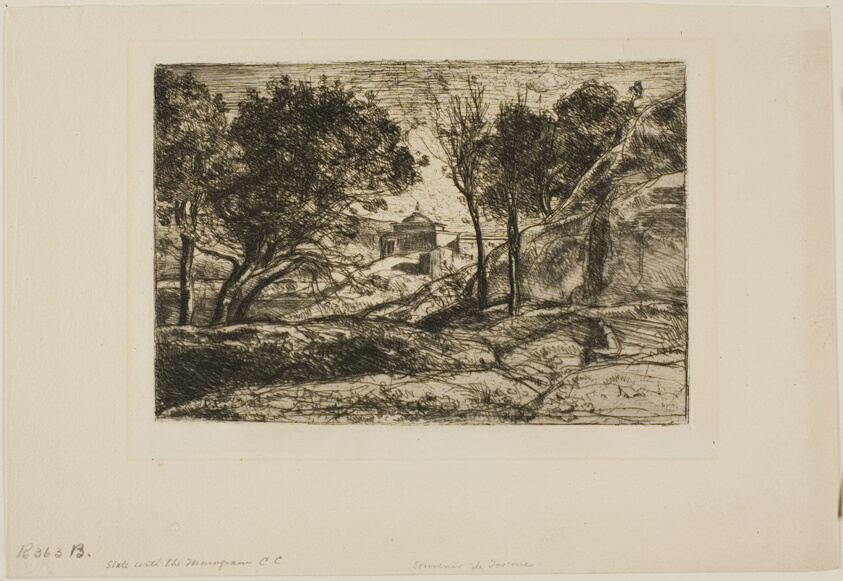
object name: Print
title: Souvenir of Tuscany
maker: Jean-Baptiste-Camille Corot; French, 1796-1875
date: c. 1845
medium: Etching on ivory laid paper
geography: France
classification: etching; print; prints and drawing